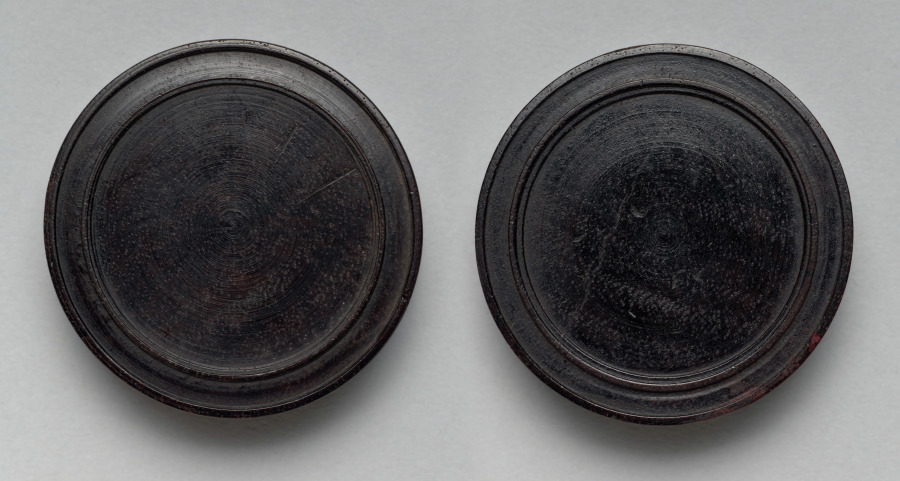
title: Gaming Piece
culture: Germany, late 17th-early 18th Century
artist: Martin Brunner (German, 1659–1725)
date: c.1700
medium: wood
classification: Furniture and woodwork